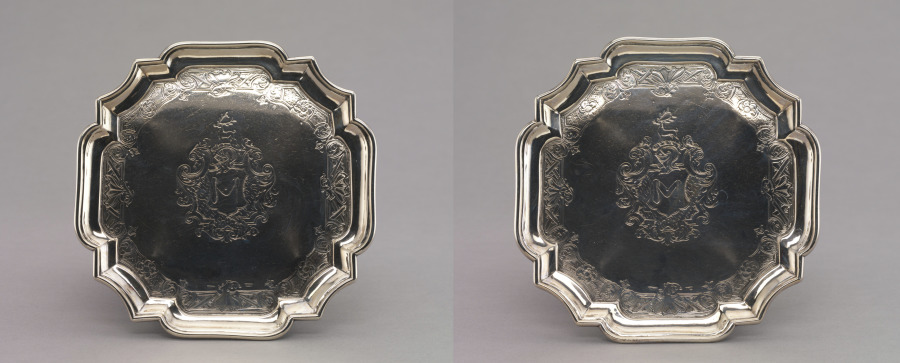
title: Pair of Salvers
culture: America, Massachusetts, Boston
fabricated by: Jacob Hurd (American, 1702–1758)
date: 1740–50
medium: silver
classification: Silver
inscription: engraved: H over A + T over 1750 in shaded block letters underneath each salver.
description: The coat of arms is that of the Hastings family, the original owners of these serving pieces.